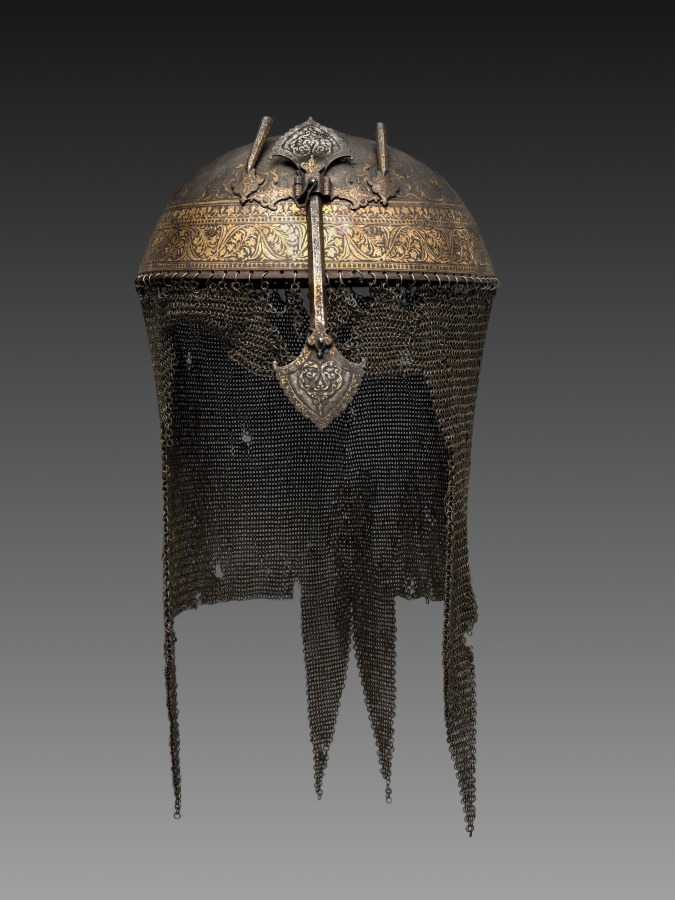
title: Helmet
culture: North India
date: 1600s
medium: steel with gold and brass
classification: Arms and Armor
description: Mughal soldiers wore hemispherical steel helmets to battle. This helmet’s surface features decorative floral patterns created using a process called damascening, in which gold wire was hammered into steel grooves. A leaf-shaped guard slides down in front of the nose for protection. The short tubes on either side of the nasal guard were for holding plumes, most popularly black heron feathers or white aigrettes. The spike that would have been on the apex has broken off. Also missing is the stuffed cotton padding that lined the interior. Chain mail made up of interlocking steel wire rings protected the ears, neck, and shoulders.